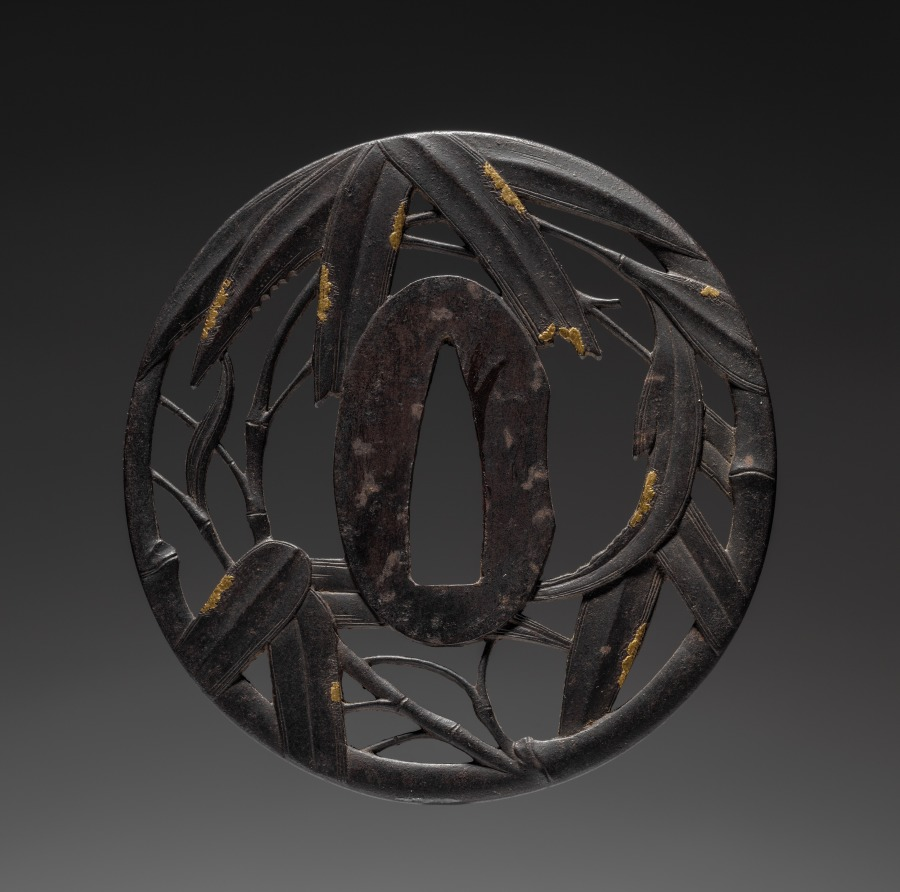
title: Sword Guard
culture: Japan, Edo period (1615–1868)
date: early 1800s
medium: iron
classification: Arms and Armor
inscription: Signature: Otaka Hironaga